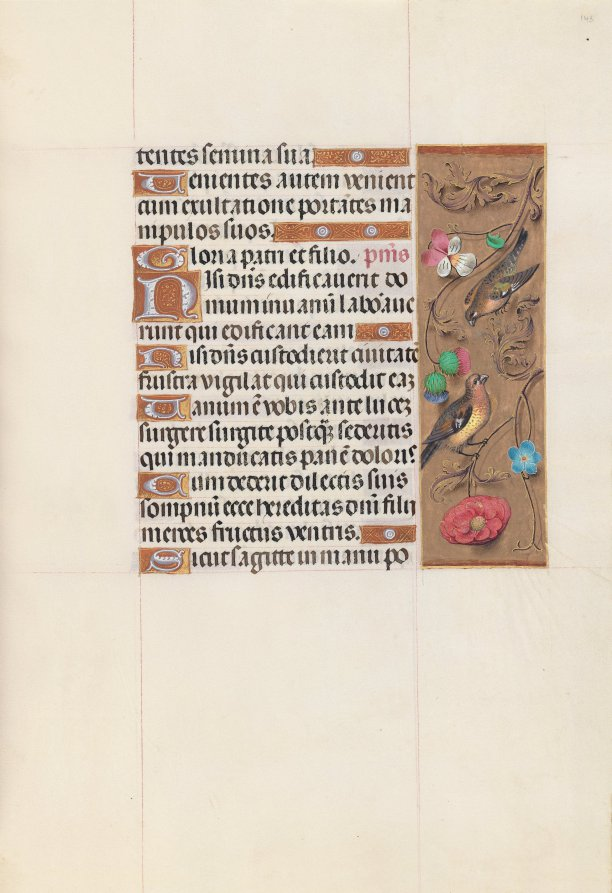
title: Hours of Queen Isabella the Catholic, Queen of Spain: Fol. 143r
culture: Flanders, Ghent and Bruges, late 15th century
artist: Master of the First Prayerbook of Maximillian (Flemish, c. 1444–1519)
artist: and Associates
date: c. 1500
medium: ink, tempera, and gold on vellum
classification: Bound Volume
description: This manuscript was illuminated by a circle of at least five highly organized manuscript painters active in the Flemish cities of Ghent and Bruges. The principal illuminator was Alexander Bening, who painted the majority of the book's miniatures. Manuscripts produced by this circle of artists are renowned for the decoration of their borders, which typically feature a rich variety of realistically-painted flowers, birds, and butterflies. This prayer book, called a book of hours, was intended not for a cleric, but for the private devotions of a lay person-in this case, Isabella the Catholic, Queen of Spain (1451-1504). Isabella's coat of arms embellishes the book's frontispiece. It is unlikely that the book was commissioned by the Queen herself; rather, she probably received it as a diplomatic gift from someone courting her patronage, perhaps Cardinal Francisco Jimenez de Cisneros. A Franciscan friar, Jimenez was dependent upon Isabella for his advancement, first to the post of Queen's confessor in 1492, and then to Archbishop of Toledo in 1495.